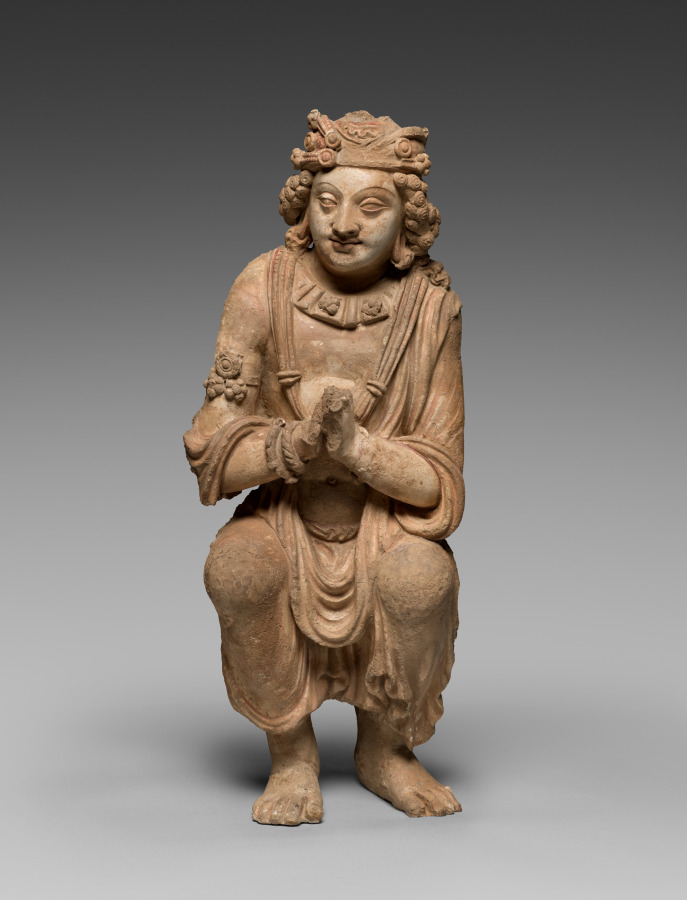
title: Adoring Attendant from a Buddhist Shrine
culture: Afghanistan, Gandhara, Kushan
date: c. 300s–400s CE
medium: stucco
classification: Sculpture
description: The medium of stucco became popular after the 4th century for works made for Buddhist sanctuaries, especially in the desert regions of Afghanistan where stone was less available. The more malleable material allowed sculptors to create sensitive and supplely modeled forms. The stucco sculptures were covered with a thin coat of lime-based whitewash, then painted; traces of original red pigment remain in some areas.